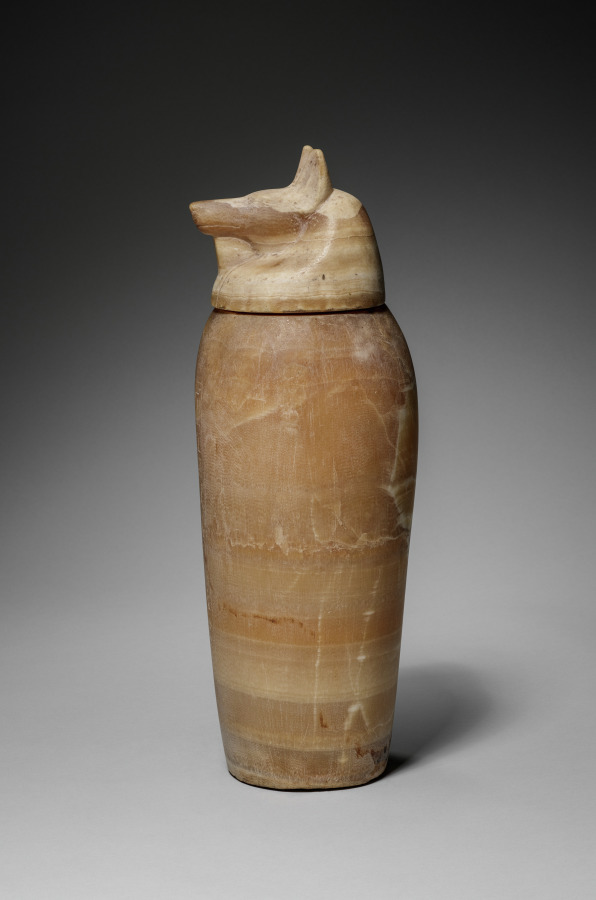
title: Canopic Jar with Jackal's Head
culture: Egypt, Late period (715–332 BCE), Dynasty 26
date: 664–525 BCE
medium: travertine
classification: Funerary Equipment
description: In the process of mummification, the liver, lungs, stomach, and intestines were removed, separately embalmed, and stored in specialized jars known as canopic jars (after a sailor in Greek mythology, who died at the town of Canopus in the Nile Delta and was worshipped there in the form of a human-headed jar). Each organ was identified with one of four funerary deities collectively known as the Sons of Horus: the liver with Imsety (man's head), the lungs with Hapy (baboon's head), the stomach with Duamutef (jackal's head), and the intestines with Qebehsenuef (falcon's head). It was their duty to protect the deceased and restore to him his body parts in the hereafter.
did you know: This jar is made of travertine stone-- subtle in color and with a captivating natural pattern-- with hieroglyphics carved on the front. Such jars were used to hold internal organs of the deceased and to preserve them for the afterlife.